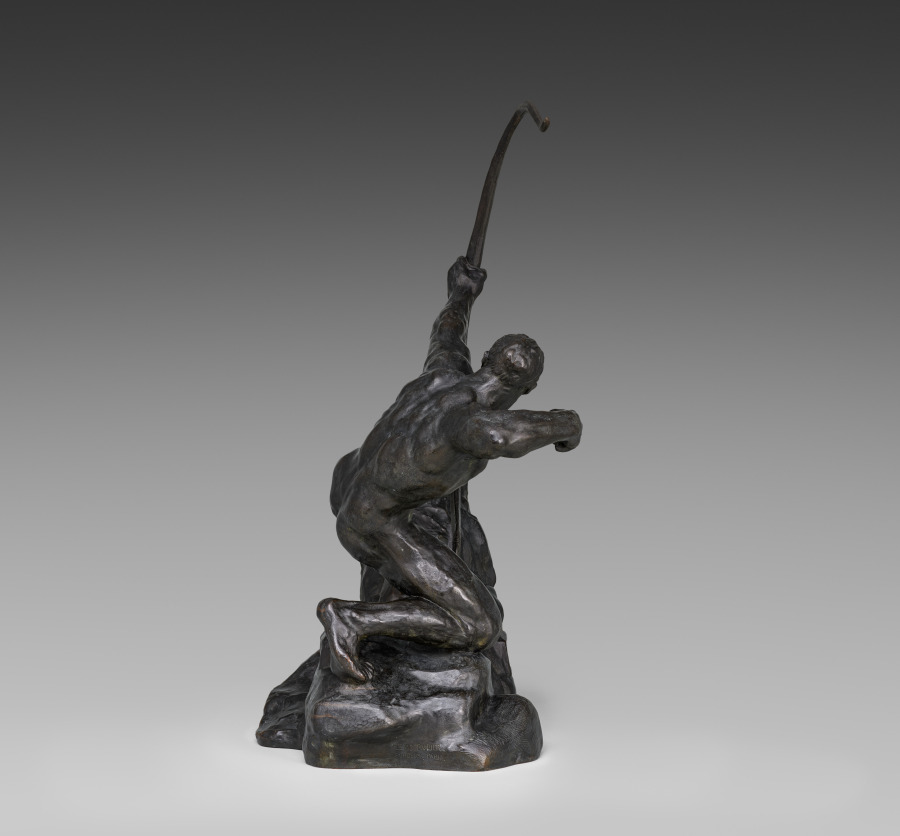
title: Herakles the Archer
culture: France, 19th century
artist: Emile Antoine Bourdelle (French, 1861–1929)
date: 1908–9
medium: bronze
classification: Sculpture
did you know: The model who posed for this sculpture was Major Paul Gustave André Doyen-Parigot, an accomplished sportsman and military commander, who was later killed during World War I in the Battle of Verdun.